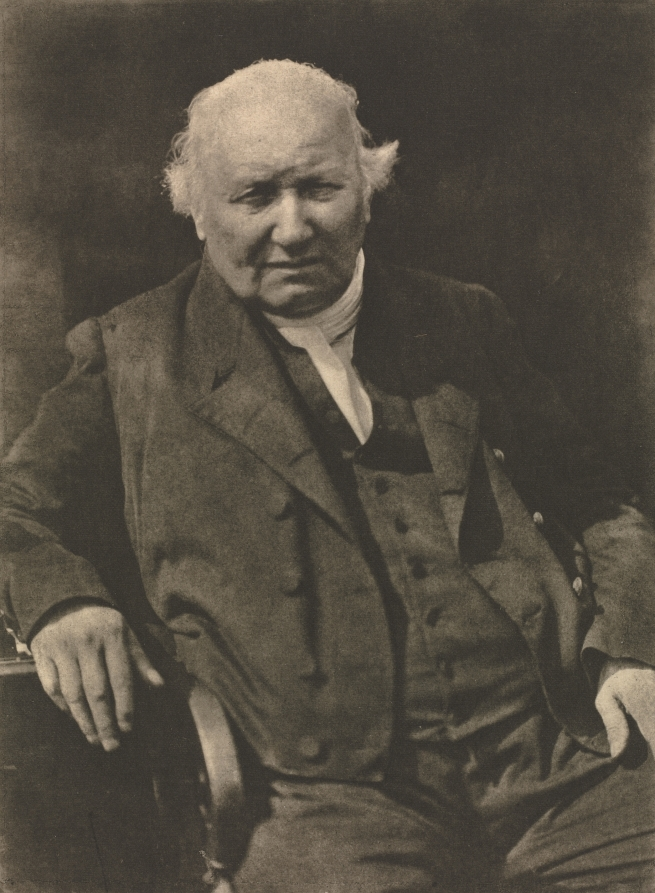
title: Camera Work: Principal Haldane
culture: England, 20th century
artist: David Octavius Hill (British, 1802–1870)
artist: and Robert Adamson (British, 1821–1848)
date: 1912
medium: photogravure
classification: Bound Volume